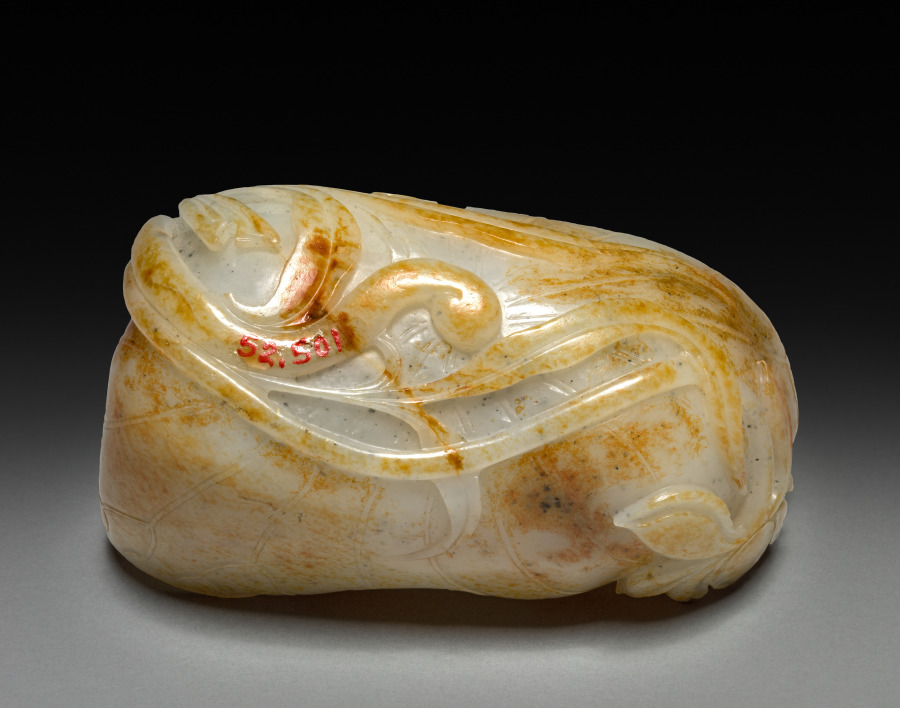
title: Cup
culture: China, Qing dynasty (1644-1911), Kangxi reign (1662-1722)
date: 1662–1722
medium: jade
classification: Jade